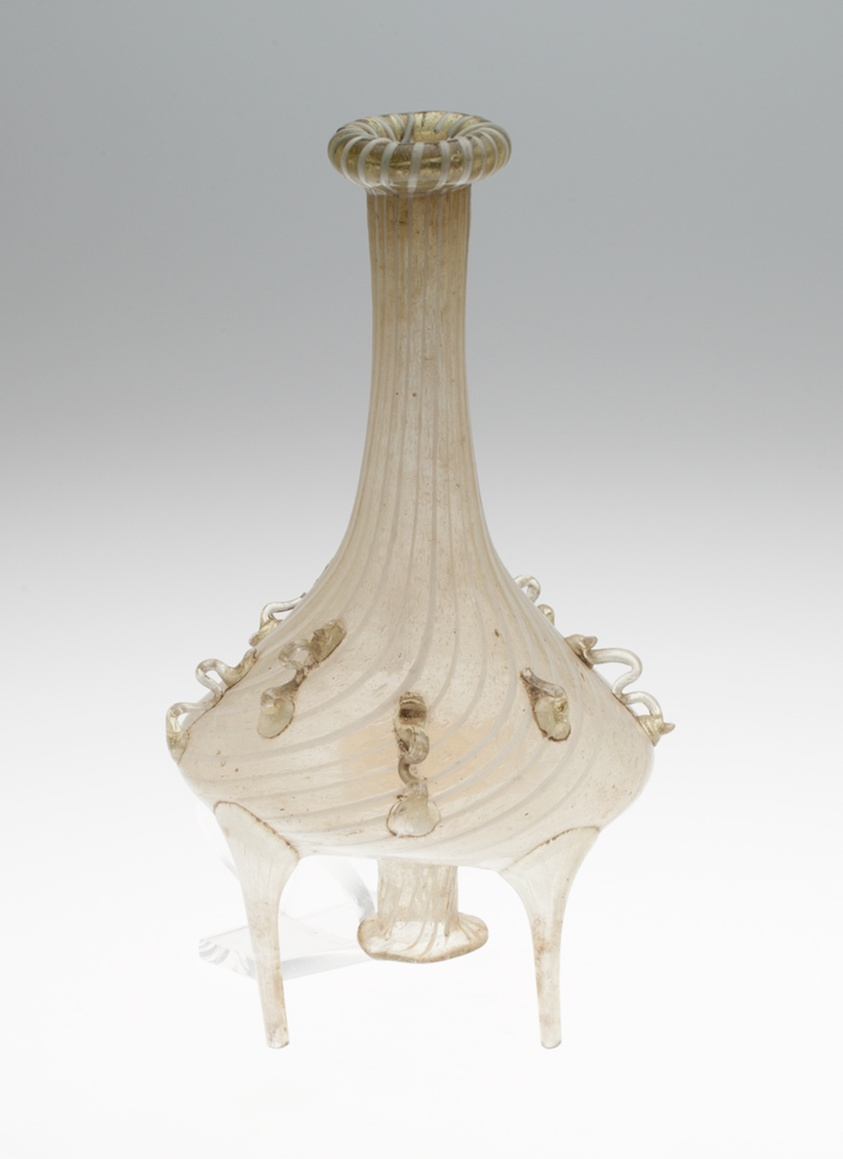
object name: Glass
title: Rose Water Sprinkler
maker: Spain, Catalonia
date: 18th century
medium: Glass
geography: Spain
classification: earthenware; european decorative arts; ceramics; glass